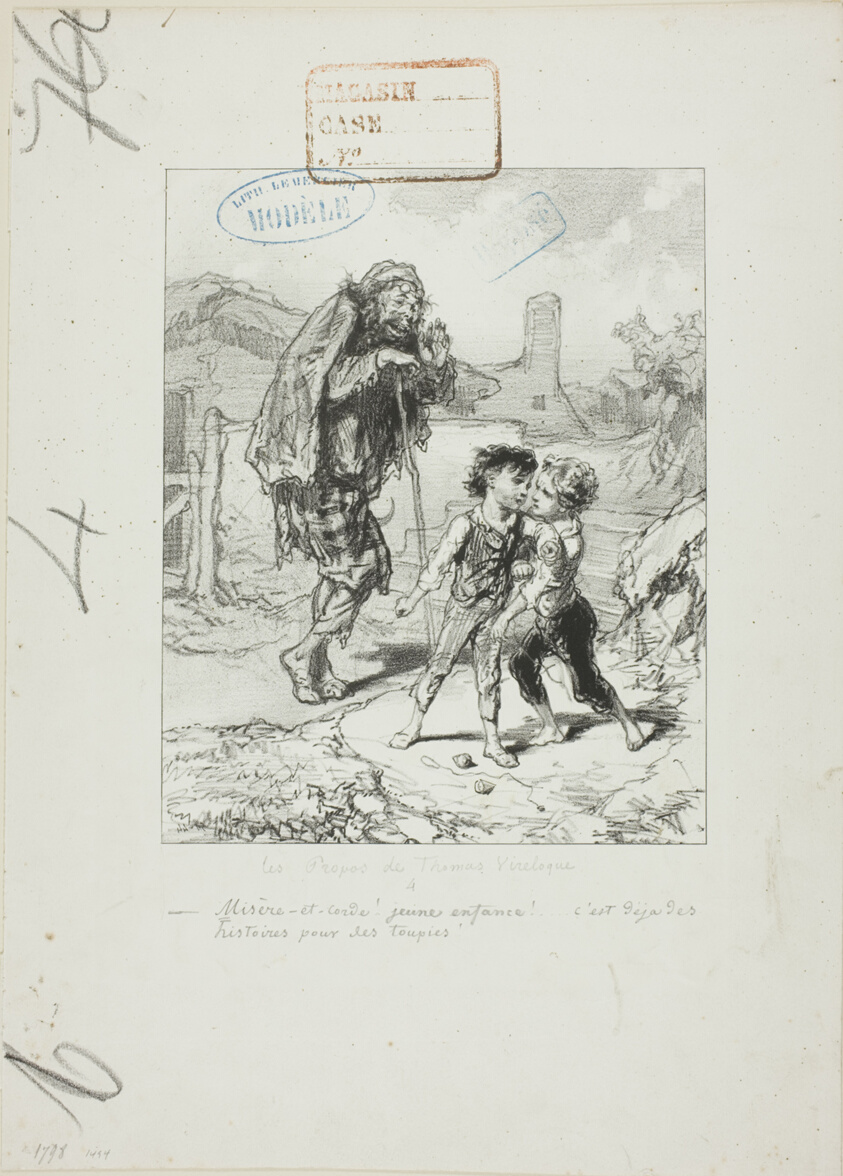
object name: Print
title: Les Propos de Thomas Vireloque: Misere et corde - quarrel for tops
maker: Paul Gavarni (French, 1804-1866)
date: 1852–53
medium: Lithograph in black on ivory wove paper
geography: France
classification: lithograph; print; prints and drawing